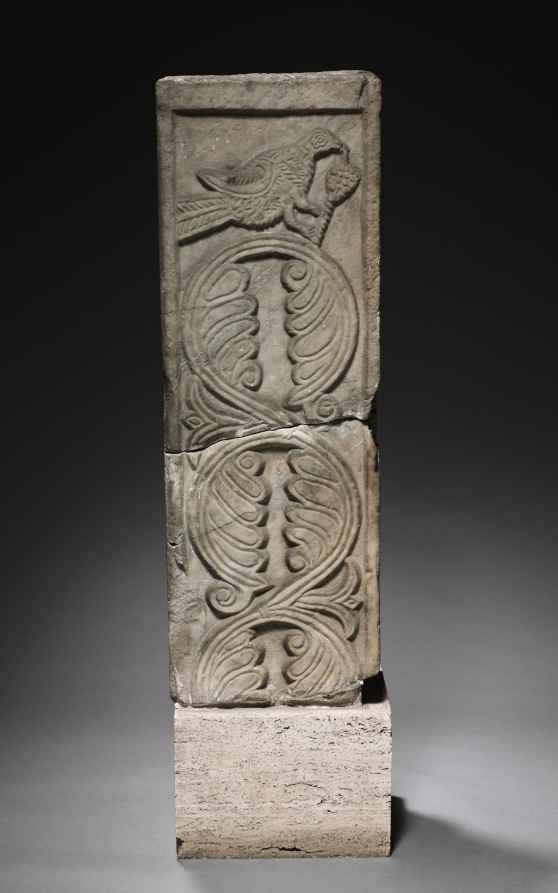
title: Transenna Post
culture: Lombardic, Italy, Rome, Migration period, 8th-9th Century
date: 700s–800s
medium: marble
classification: Sculpture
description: In Christian architecture a transenna is an openwork screen of stone or metal enclosing a shrine. These transenna elements were found in Rome; the posts were said to have been excavated on the Coelian Hill and may have originally formed part of the transenna of the Church of San Saba. The Lombards were an ancient Germanic-speaking tribe that settled in Italy after 568. Their artistic tradition was originally centered on small objects of personal adornment like buckles and brooches. After occupying Italy, the Lombards were in contact with large-scale sculpture of classical and early Christian origin that, by the end of the 700s, they had learned to adopt and imitate, as seen here.